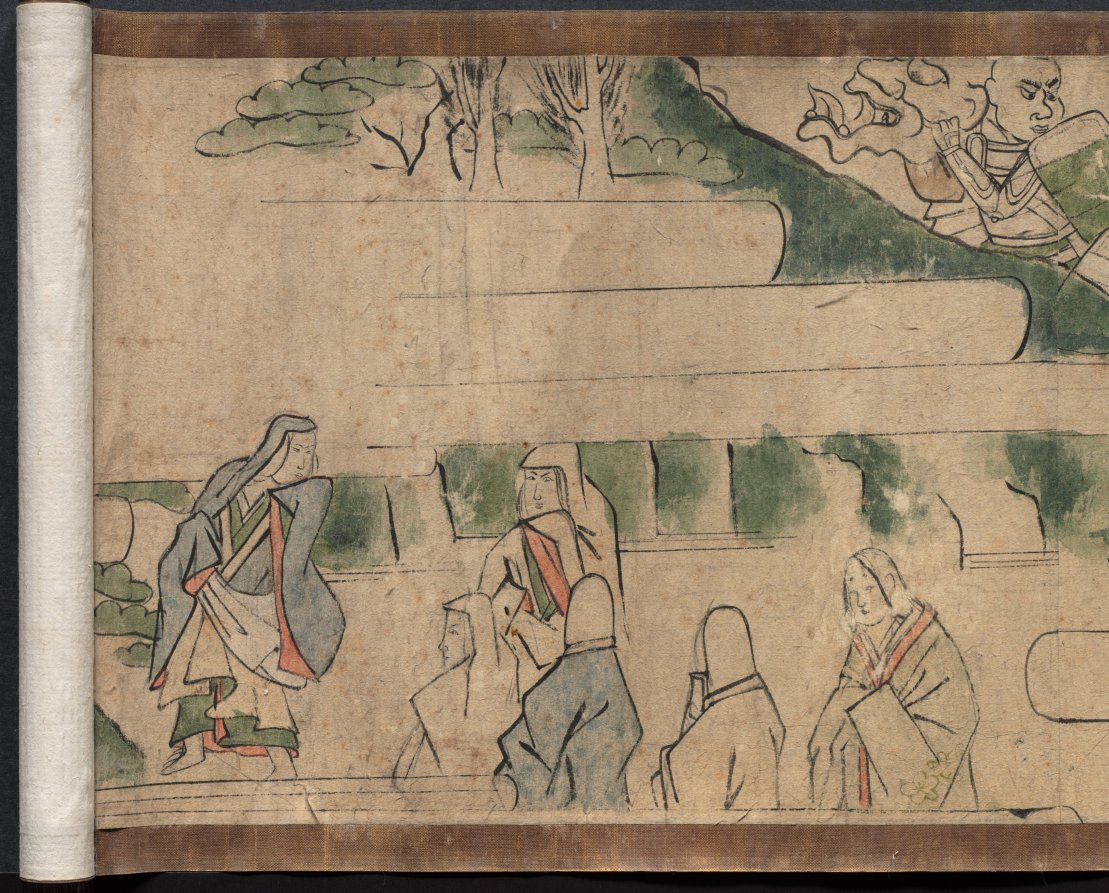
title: Oeyama Engi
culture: Japan, Edo period (1615–1868)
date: 1615–1868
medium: one of a pair of handscrolls; ink and color on paper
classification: Painting